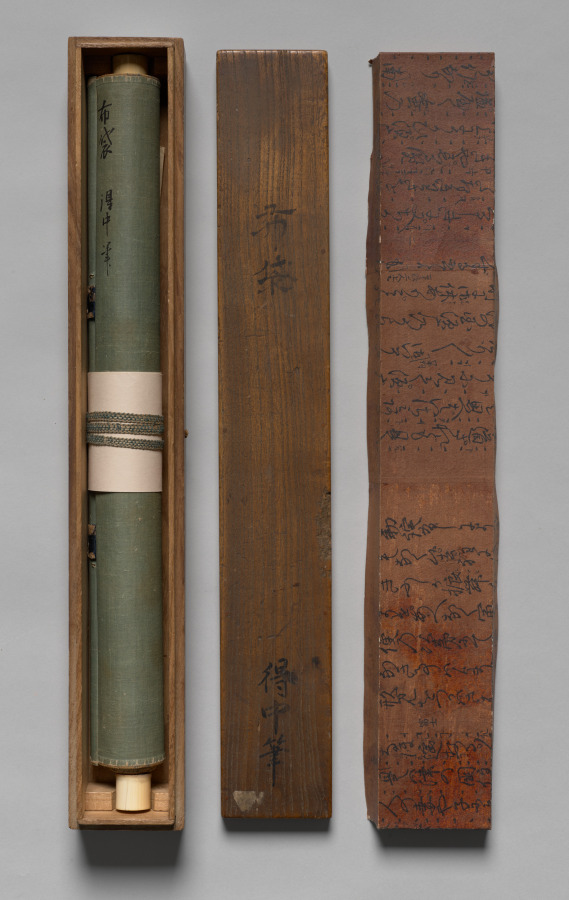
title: Hotei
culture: Japan, Muromachi period (1392–1573)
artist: Tokuchū (Japanese, late 1400s)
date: late 1400s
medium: hanging scroll; ink on paper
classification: Painting